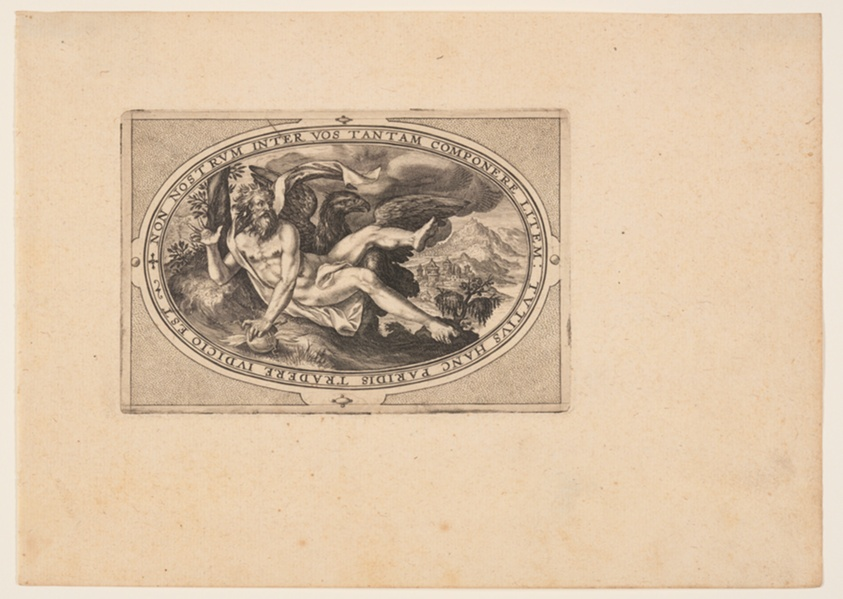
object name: Print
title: Jupiter, from Gods and Goddesses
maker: Crispijn van de Passe I; Dutch, c. 1565–1637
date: 1592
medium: Engraving on paper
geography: Netherlands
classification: engraving; paper; print; prints and drawing